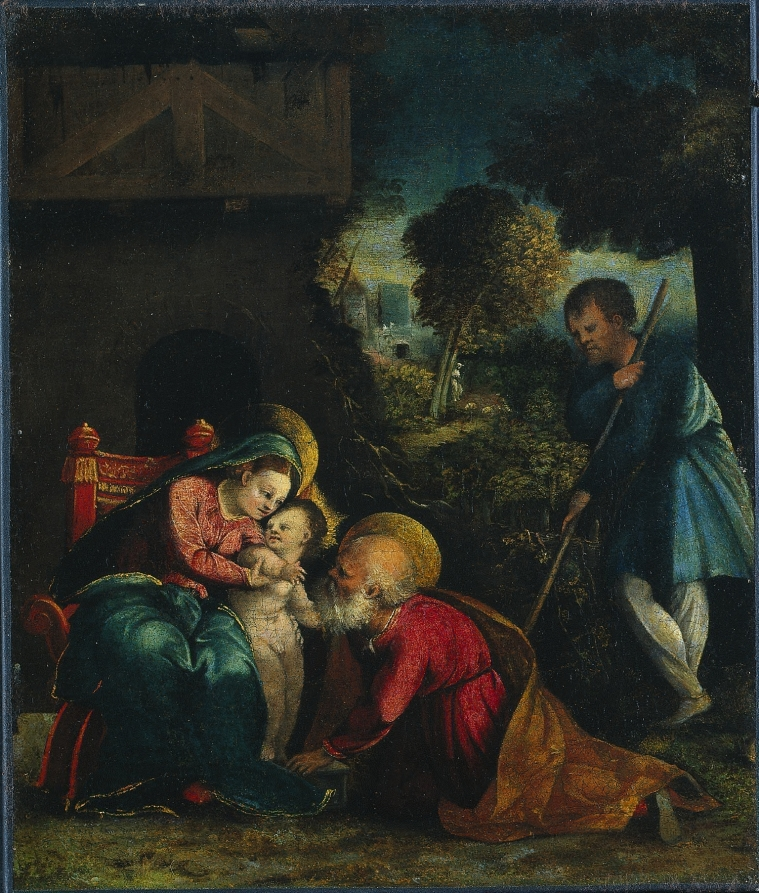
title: Holy Family with a Shepherd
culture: Italy, 16th century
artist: Battista Dossi (Italian, c. 1490–1548)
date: early 1520s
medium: oil on canvas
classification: Painting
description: In this image of the Holy Family, Joseph and Mary lean in to admire the Christ Child while a shepherd looks on, leaning on his staff. Before executing this painting, Battista visited Rome, including an extensive study of Raphael's works. Afterward, Battista began a second style of painting, seen in the flexible pose of Christ, the small hands of the adult figures, the high foreheads, and each figure looking sideways or upward. The landscape is impressionistic and grainy as mysterious silvery-blue moonlight accents the thickly wooded landscape. Rich reds, browns, and greens color the picturesque landscapes, typical of Battista's second style. This small painting was originally attributed to Battista Dossi's brother, Dosso. Both brothers served as court painters to the Duke Alfonso I of Ferrara. However, the symmetry and vibrant colors of the painting, as well as the facial styles of the figures, characterize the work of Battista Dossi.